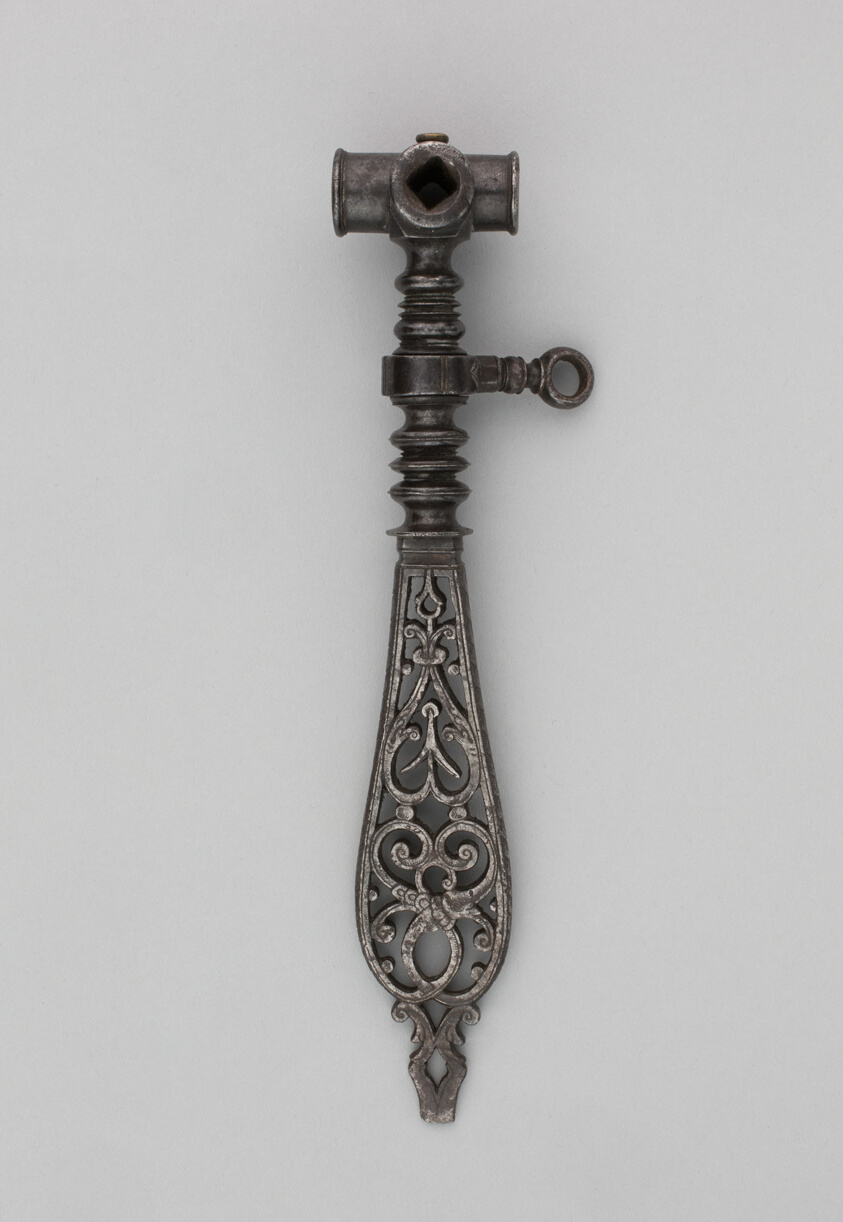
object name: Arms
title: Wheel-Lock Spanner and Turnscrew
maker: German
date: mid–17th century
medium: Iron, blued, fretted and engraved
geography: Germany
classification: firearm-accessory; arms; arms and armor